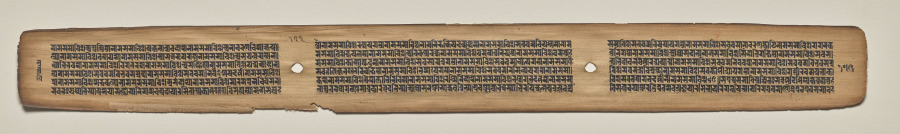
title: Text, folio 173 (verso), from a Manuscript of the Perfection of Wisdom in Eight Thousand Lines (Ashtasahasrika Prajnaparamita-sutra)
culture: Eastern India, Bihar, Vikramashila Monastery. Painting: Nepal, Kathmandu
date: Sunday, September 14, 1119 (year 239 of the Newar Samvat in the month of Ashvina)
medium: gum tempera and ink on palm leaves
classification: Painting